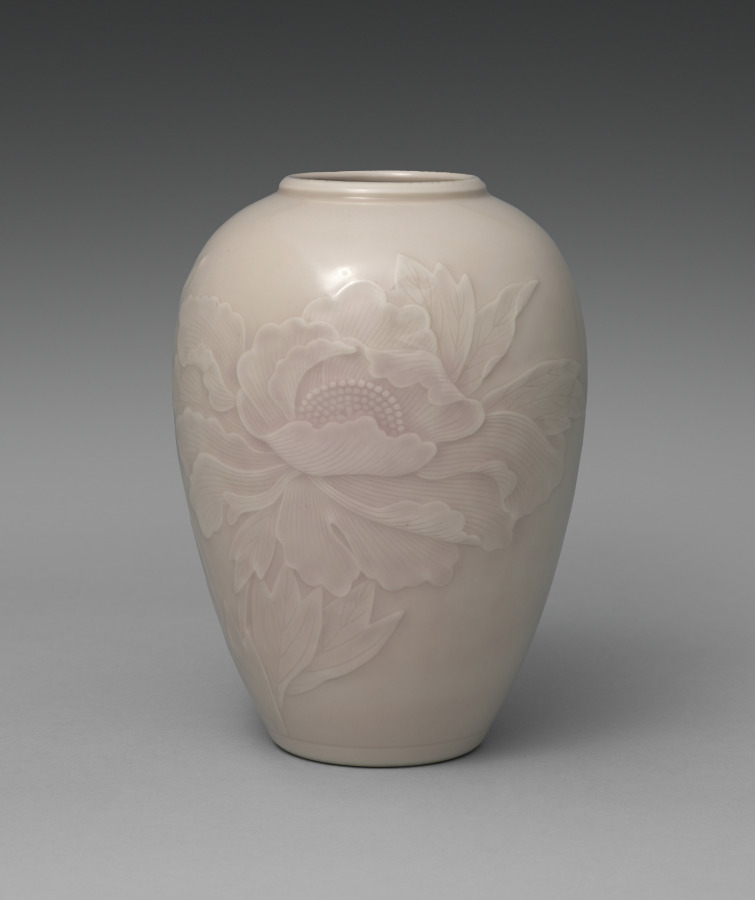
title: Vase with Peonies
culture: Japan, Meiji period (1868–1912)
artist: Seifū Yohei III (Japanese, 1851–1914)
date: 1900–1914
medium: Porcelain with molded and carved design and pink-infused cream glaze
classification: Ceramic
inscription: 清風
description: This flower vase has a creamy white glaze infused with pink. Sadly, the box has been lost, so we cannot know how it was described by the studio. However, through comparison with other works, it is possible to surmise that the work can be categorized as kanpakuji with in-glaze pink. A single huge blossom shoots up into the widest part of the vessel, near the top, so it will be visible from a distance. If this design is displayed in a space with a decorative alcove located some distance away from the entrance, even at a remove, it can announce the taste of its owner and immediately please a guest. On the other side of the vase, two butterflies, their wings overlapping, flit through the sky.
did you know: One of Seifū Yohei III’s most visually impactful techniques was to combine complex low-relief designs in clay surrounded by diffused underglaze blue or pink, which he then covered with a transparent or translucent glaze.